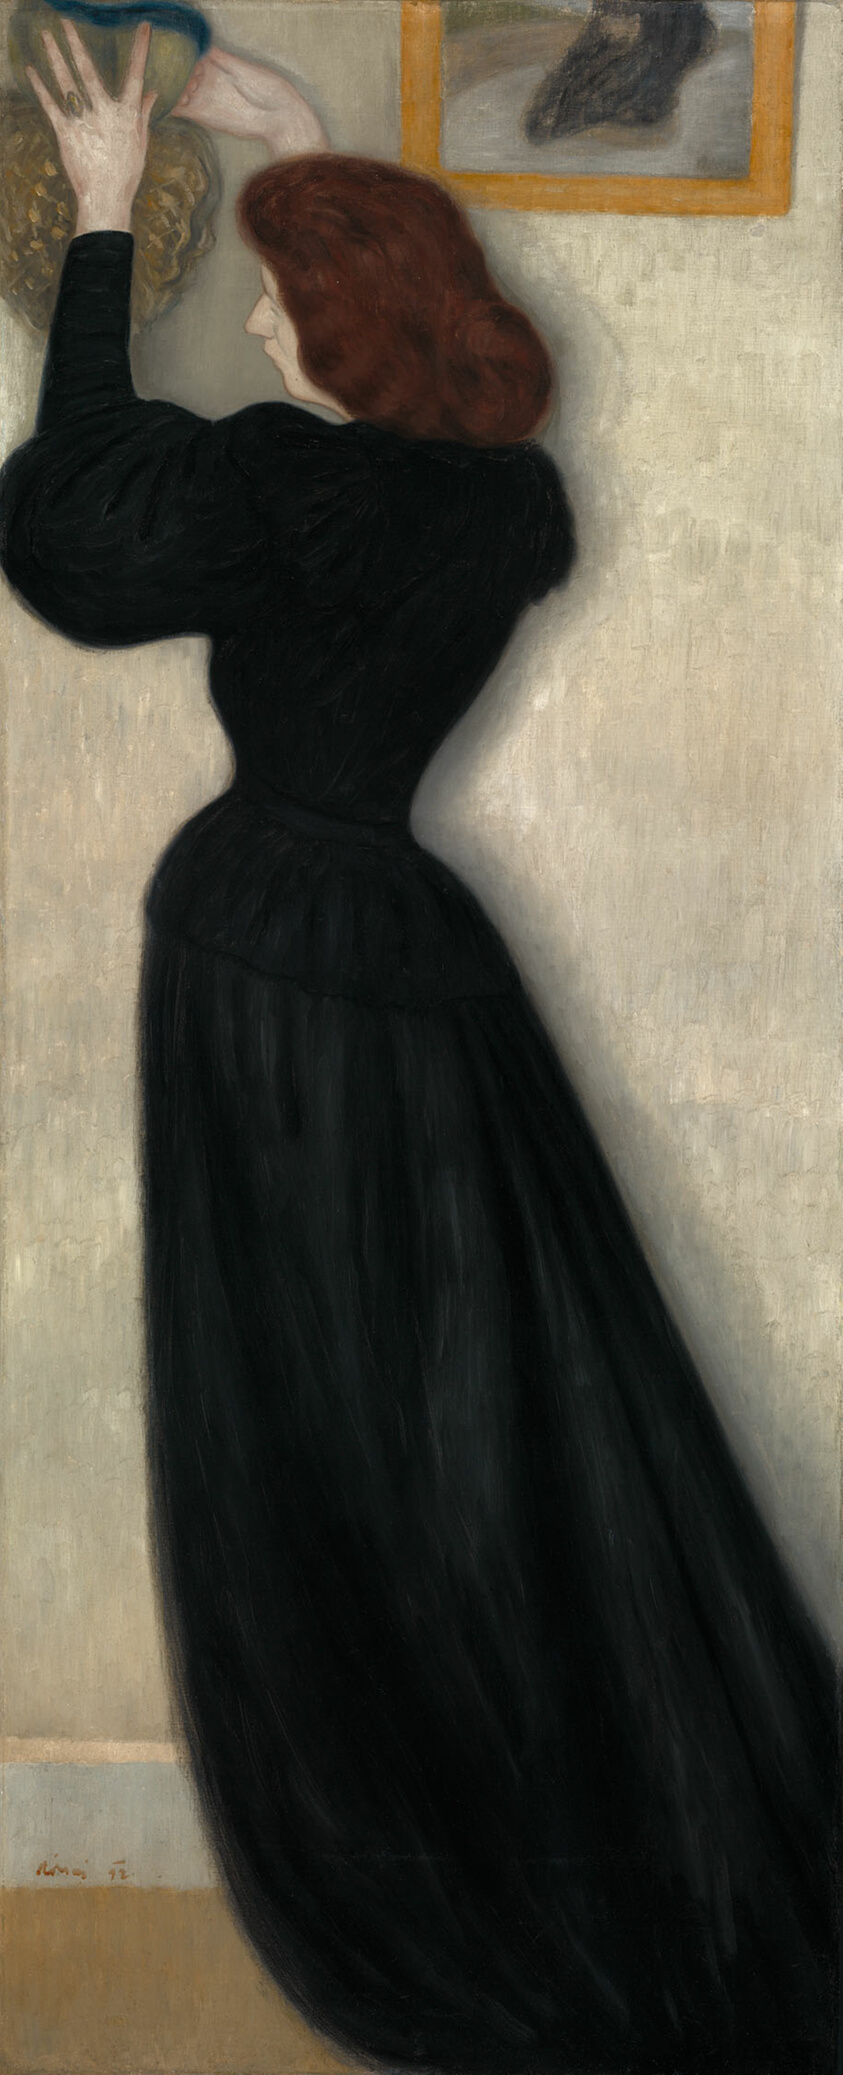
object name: Painting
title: Slender Woman with Vase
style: nineteenth century, 19th century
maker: József Rippl-Rónai (Hungarian, 1861–1927)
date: 1894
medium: Oil on canvas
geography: Hungary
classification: painting; paint; oil paintings (visual works); oil on canvas; european painting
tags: woman, wall, painting, interior, black (color), dresses, jewelry